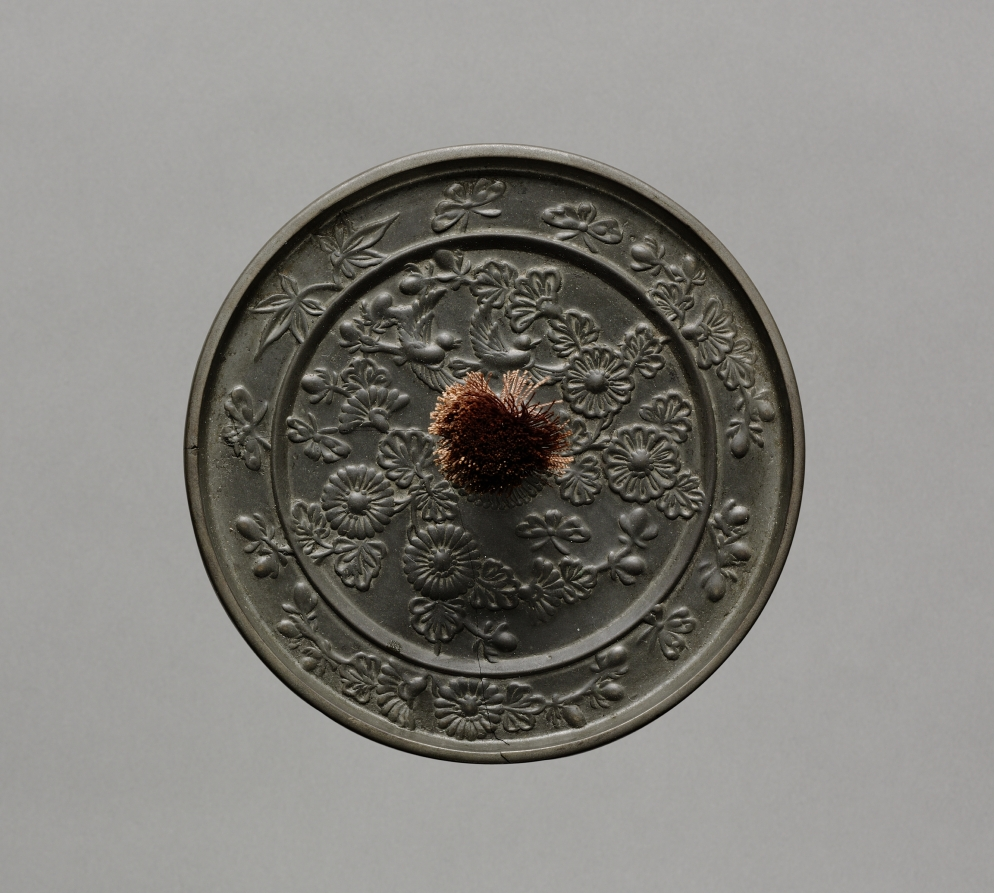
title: Mirror with Pair of Birds in Chrysanthemum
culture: Japan, Muromachi period (1392–1573)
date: 1392–1573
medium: bronze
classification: Metalwork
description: The Japanese used chrysanthemums as decorative elements on mirrors. In the Heian period, a chrysanthemum with cranes or long-tailed birds was a common motif. Later, in the Kamakura and Muromachi periods, chrysanthemum designs were divided into three patterns with different symbolic associations: Chrysanthemum with Cranes represented longevity; Water Flowing suggested longevity as well as the Noh drama Kikujido, or Chrysanthemum Boy; and East Fence alluded to the poem "Drinking Wine" by Tao Yuanming (AD 365–427). Here, the mirror featuring Buddhist iconography (kyojo) and a chrysanthemum design on the back shows that the flower was also appreciated in the context of Buddhism in the Kamakura period.